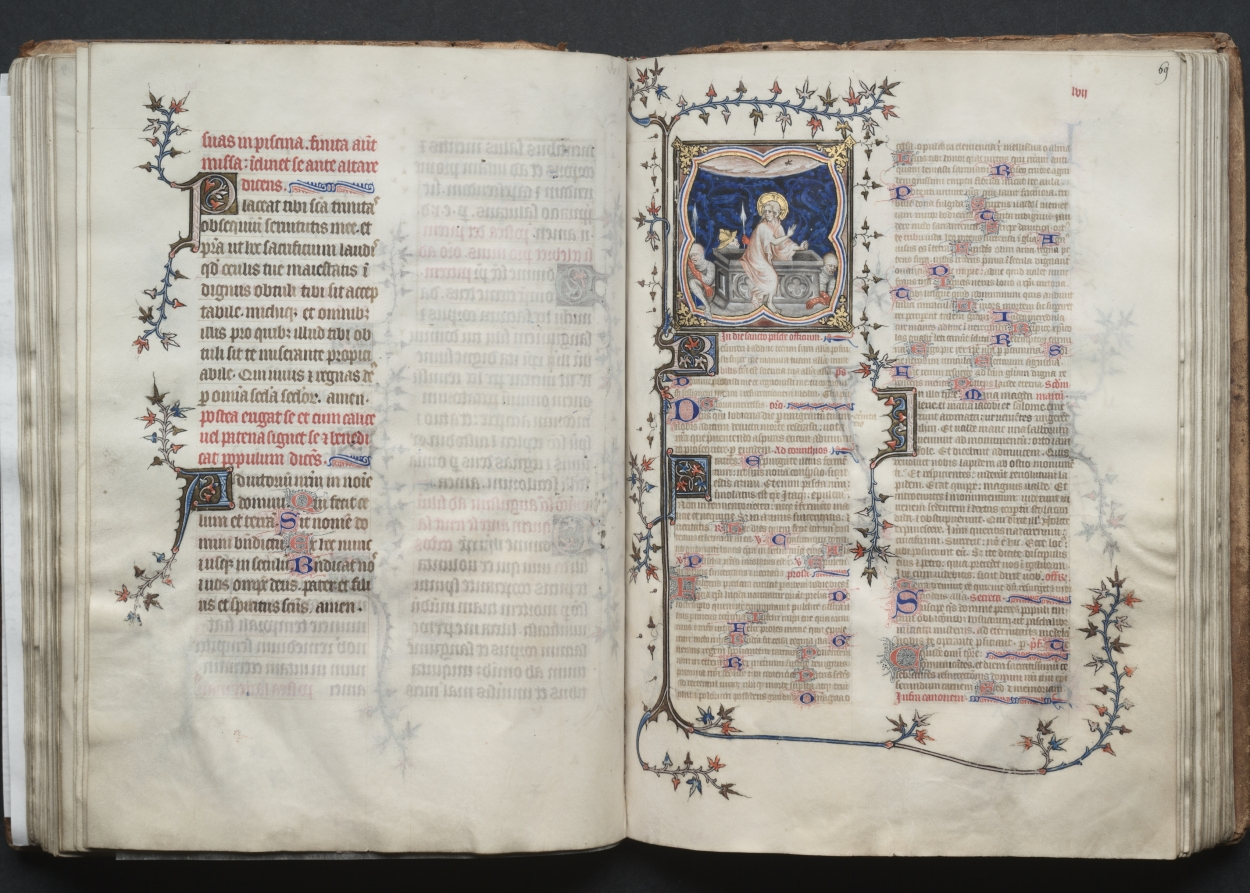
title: The Gotha Missal: Fol. 68v, Text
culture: France, Paris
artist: Master of the Boqueteaux (French)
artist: and Workshop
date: c. 1375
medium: ink, tempera, and gold on vellum; blind-tooled leather binding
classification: Bound Volume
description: The style and quality of this manuscript's decoration is typical of deluxe Parisian books made for aristocratic or royal patrons. Most of the book's decoration appears to be the work of the Master of the Boqueteaux, an artist active at the court of King Charles V (died 1380). His style was apparently shared by a number of book illuminators working in and around Paris. It is very possible that the Gotha Missal belonged to Charles V, but is not provable because the manuscript has no royal portraits and lacks a colophon. Given the book's magnificent decoration, however, it would seem that it was produced for a Valois prince, if not for the king himself. The manuscript receives its name from the German dukes of Gotha, its later owners.